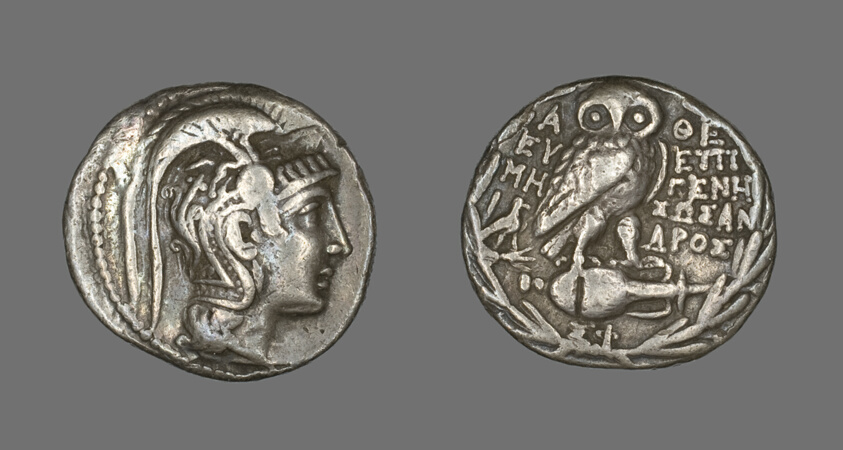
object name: Coin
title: Tetradrachm (Coin) Depicting the Goddess Athena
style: greek, ancient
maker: Greek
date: about 163 BCE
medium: Silver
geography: Athens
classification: coin; ancient art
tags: goddesses, owl